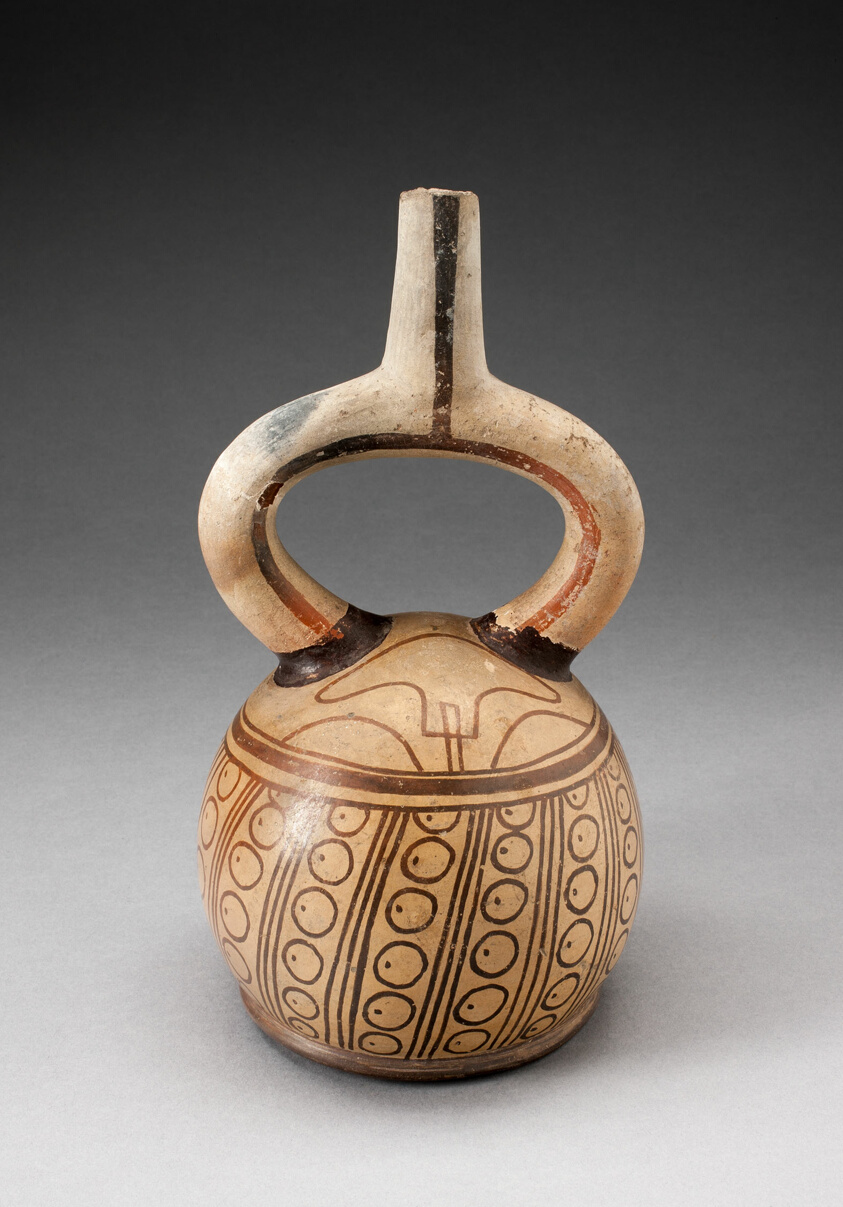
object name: Vessel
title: Stirrup Spout Vessel with Circular Motifs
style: moche, mochica v, mochica, early intermediate period, Pre-Columbian, americas, Arts of the Americas, andean, andes, south american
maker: Moche (North coast, Peru)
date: 100 BCE–500 CE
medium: Ceramic and pigment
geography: Peruvian North Coast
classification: earthenware; ceramics; vessel; art of the americas